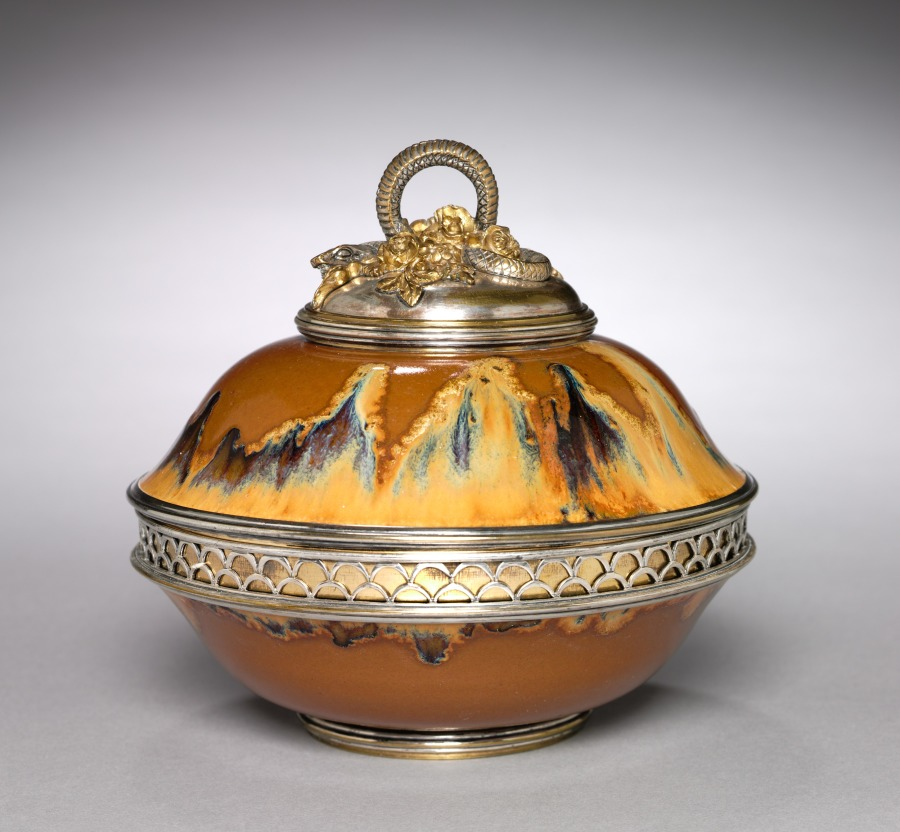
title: Covered Bowl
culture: France, late 19th-early 20th Century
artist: Auguste Delaherche (French, 1857–1940)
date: c. 1899–1900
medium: stoneware with metal mounts, silvered and gilded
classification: Ceramic